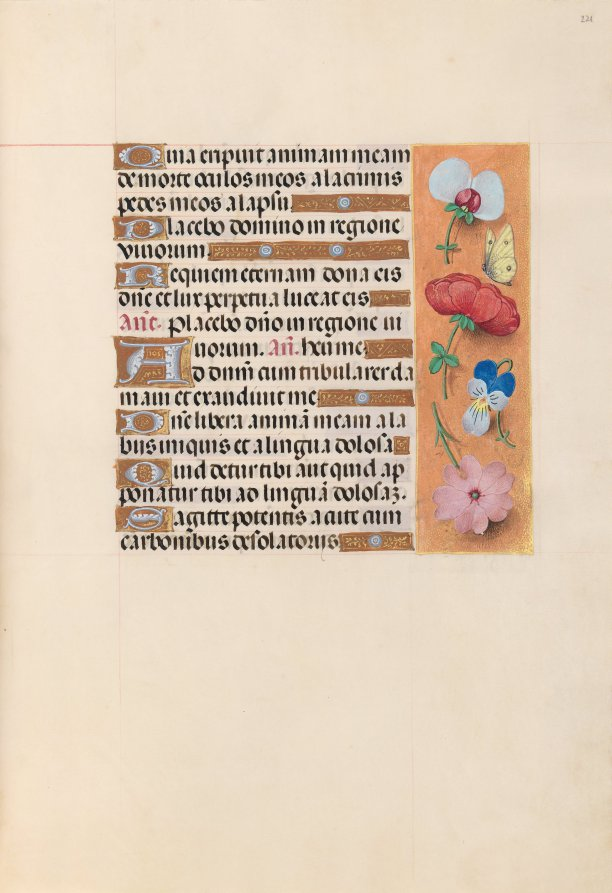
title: Hours of Queen Isabella the Catholic, Queen of Spain: Fol. 221r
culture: Flanders, Ghent and Bruges, late 15th century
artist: Master of the First Prayerbook of Maximillian (Flemish, c. 1444–1519)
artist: and Associates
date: c. 1500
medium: ink, tempera, and gold on vellum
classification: Bound Volume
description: This manuscript was illuminated by a circle of at least five highly organized manuscript painters active in the Flemish cities of Ghent and Bruges. The principal illuminator was Alexander Bening, who painted the majority of the book's miniatures. Manuscripts produced by this circle of artists are renowned for the decoration of their borders, which typically feature a rich variety of realistically-painted flowers, birds, and butterflies. This prayer book, called a book of hours, was intended not for a cleric, but for the private devotions of a lay person-in this case, Isabella the Catholic, Queen of Spain (1451-1504). Isabella's coat of arms embellishes the book's frontispiece. It is unlikely that the book was commissioned by the Queen herself; rather, she probably received it as a diplomatic gift from someone courting her patronage, perhaps Cardinal Francisco Jimenez de Cisneros. A Franciscan friar, Jimenez was dependent upon Isabella for his advancement, first to the post of Queen's confessor in 1492, and then to Archbishop of Toledo in 1495.